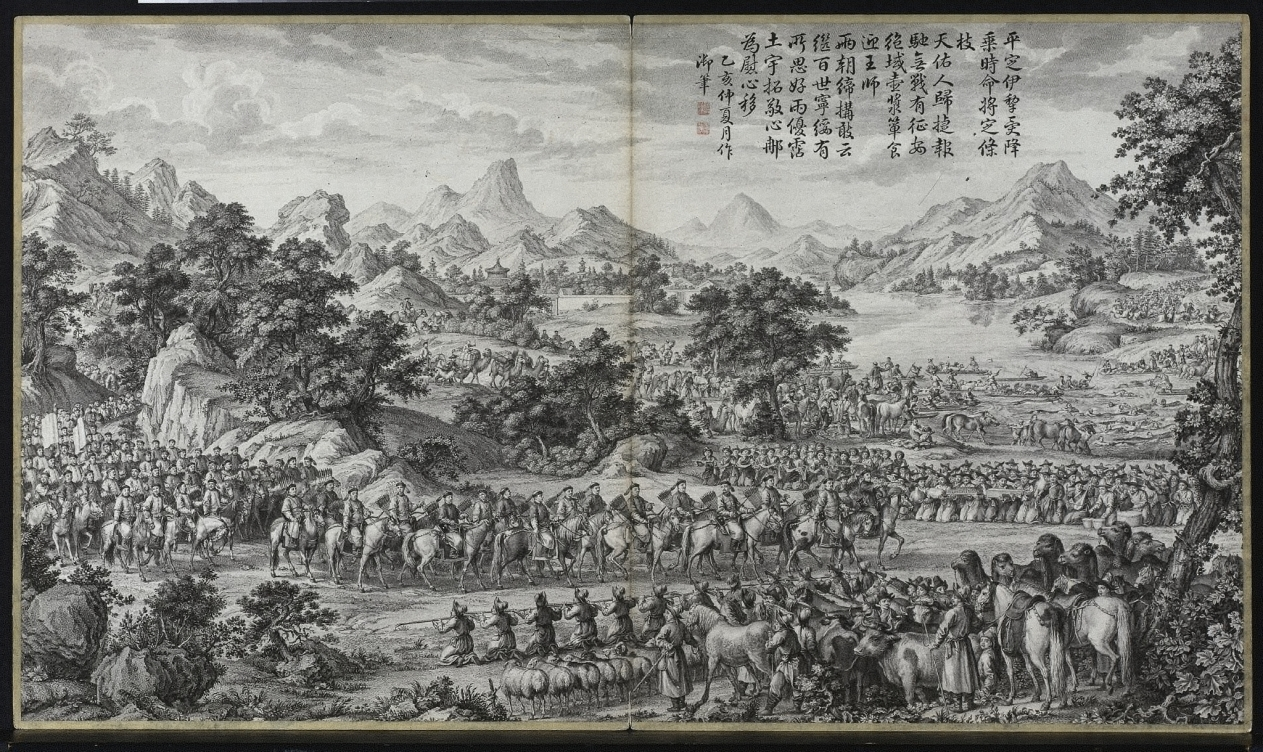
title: Receiving Surrender from the Eli: from Battle Scenes of the Quelling of Rebellions in the Western Regions, with Imperial Poems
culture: China, Qing dynasty (1644–1911), Qianlong reign (1736–95)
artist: Giuseppe Castiglione (Italian, 1688–1766)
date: c. 1765–74; poem dated 1755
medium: etching, mounted in album form, 16 leaves plus two additional leaves of inscriptions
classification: Print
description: This set of etchings was commissioned by Emperor Qianlong to record in pictorial terms the courage of his generals and soldiers in quelling the rebellions in the Western Regions. Qianlong added his own poem to each of the etchings, indicating his appreciation and pride in this demonstration of military might. "Western Regions" refers to the present-day Xingjiang province, often described in Western writing as "Central Asia."